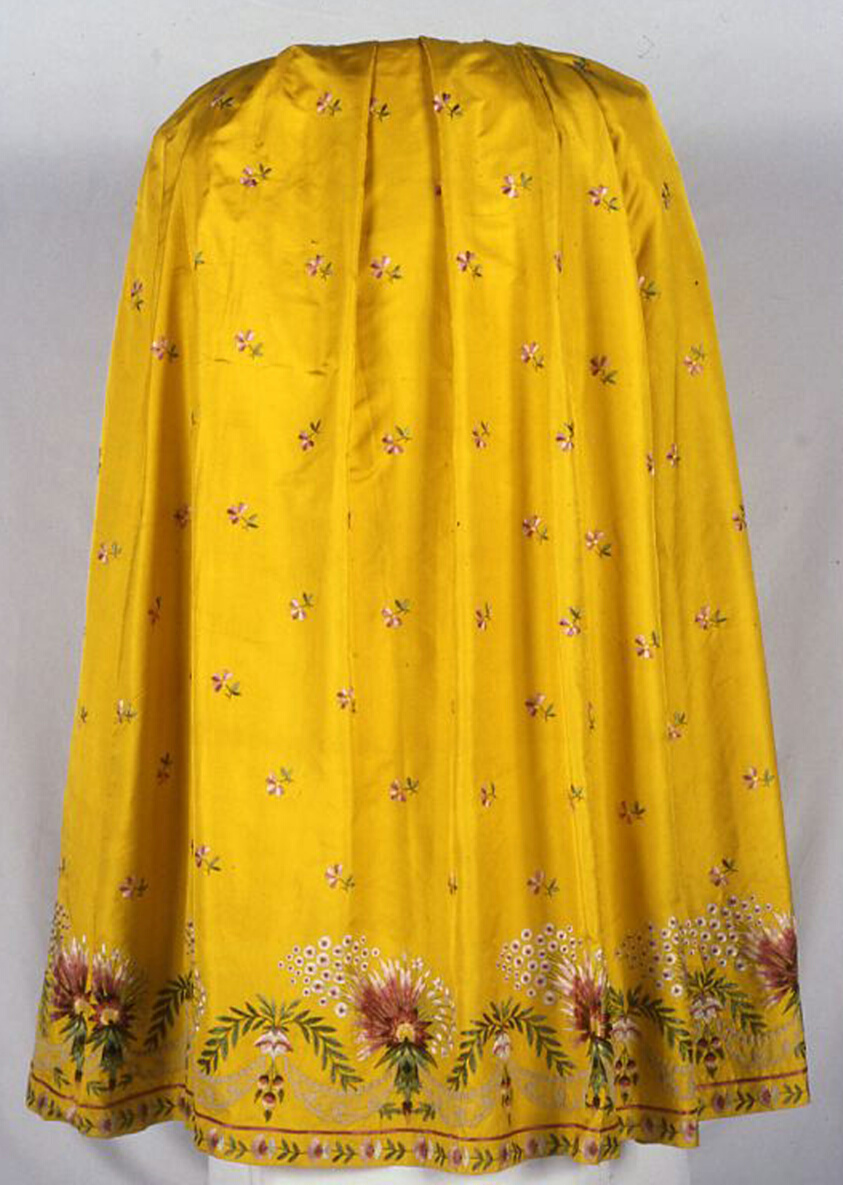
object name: Costume and Accessories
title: Skirt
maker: France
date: c. 1785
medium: Silk, warp-float faced twill weave; appliquéd with silk, machine-made hexagonal lace mesh; and embroidered with silk floss, silk chenille yarns, cotton and silk chenille yarns, and cotton yarns in satin and stem stitches; French knots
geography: France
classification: textile; needlework (visual works); costume; skirt (garment)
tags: floral arrangements, garlands, flowers, yellow (color), pink (color), green (color), foliage